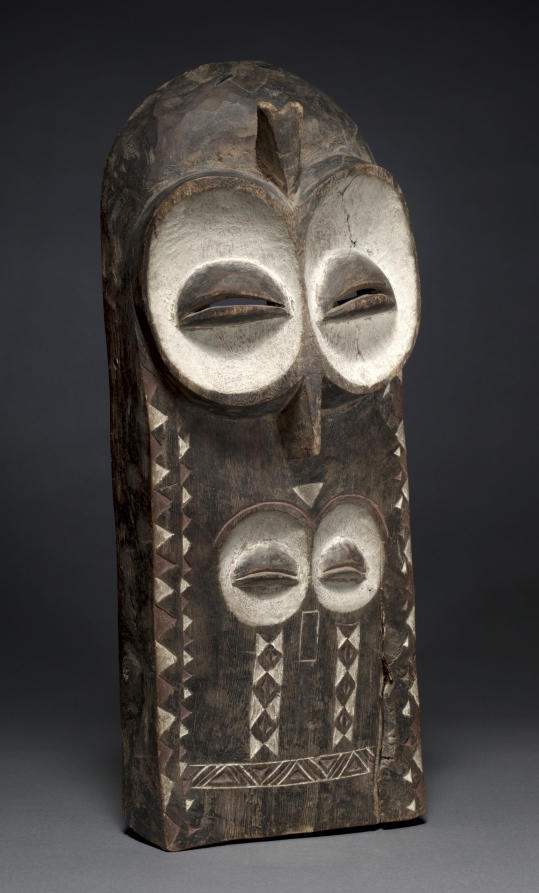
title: Mask (Emangungu)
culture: Africa, Central Africa, Democratic Republic of Congo, Bembe-style maker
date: possibly early 1900s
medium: Wood, kaolin, colorant, and iron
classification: Mask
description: Among the Bembe, anthropo-zoomorphic plank masks are used in circumcision rites called butende. They are worn along with a costume of bark and banana leaves by the initiated boys who beg for food in the village while living in seclusion in the forest. The sculpture’s short projections above the forehead are identified as an owl’s tufts. The two pairs of eyes could refer to divination.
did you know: White kaolin clay highlights the eyes of this carved wooden mask.